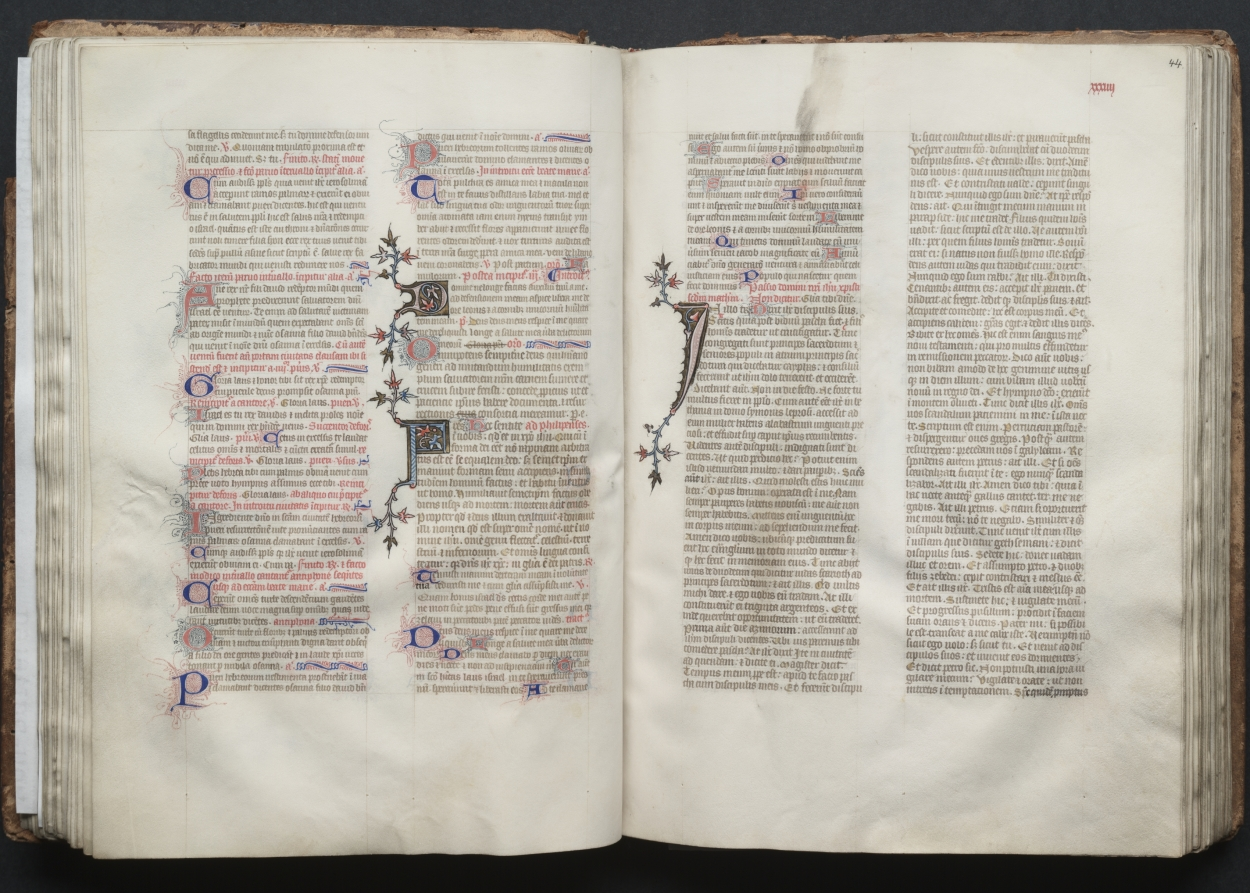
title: The Gotha Missal: Fol. 44r, Text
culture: France, Paris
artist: Master of the Boqueteaux (French)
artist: and Workshop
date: c. 1375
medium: ink, tempera, and gold on vellum; blind-tooled leather binding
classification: Bound Volume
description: The style and quality of this manuscript's decoration is typical of deluxe Parisian books made for aristocratic or royal patrons. Most of the book's decoration appears to be the work of the Master of the Boqueteaux, an artist active at the court of King Charles V (died 1380). His style was apparently shared by a number of book illuminators working in and around Paris. It is very possible that the Gotha Missal belonged to Charles V, but is not provable because the manuscript has no royal portraits and lacks a colophon. Given the book's magnificent decoration, however, it would seem that it was produced for a Valois prince, if not for the king himself. The manuscript receives its name from the German dukes of Gotha, its later owners.